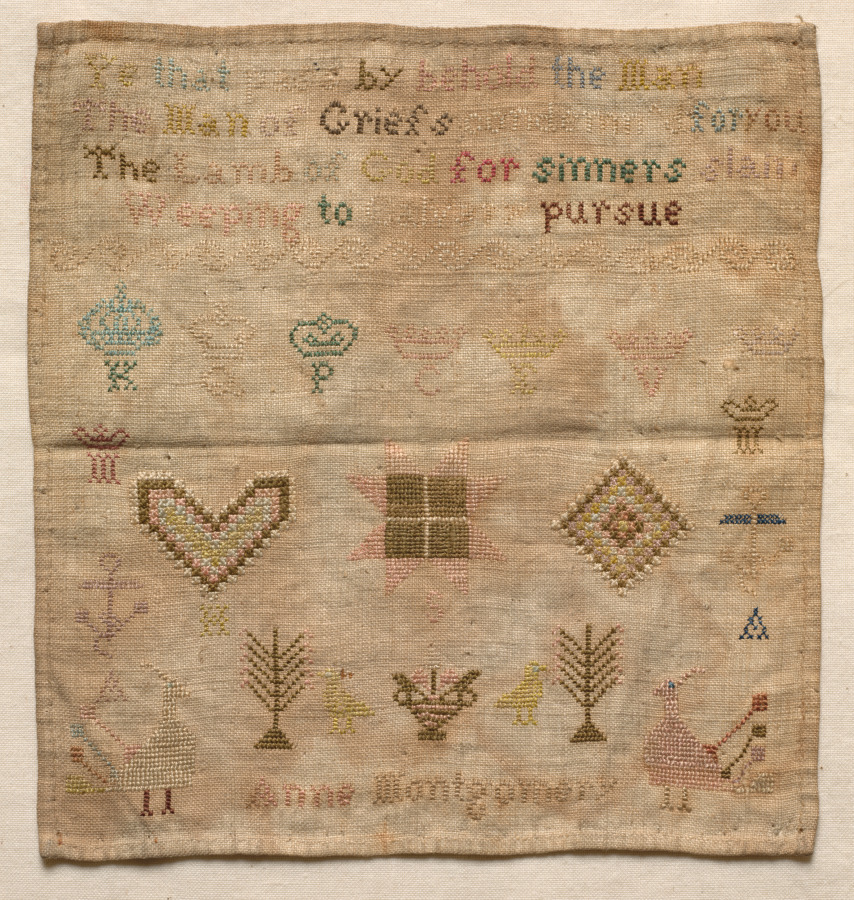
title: Sampler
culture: England, 19th century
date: 1800s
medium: embroidery: silk on linen tabby ground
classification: Sampler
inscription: verse at top; underneath, row of coronets surmounting initials: K(ing) Q(ueen) P(rince) C(ount) E(arl) V(iscount) M(arquis). Signed: Anne Montgomery.